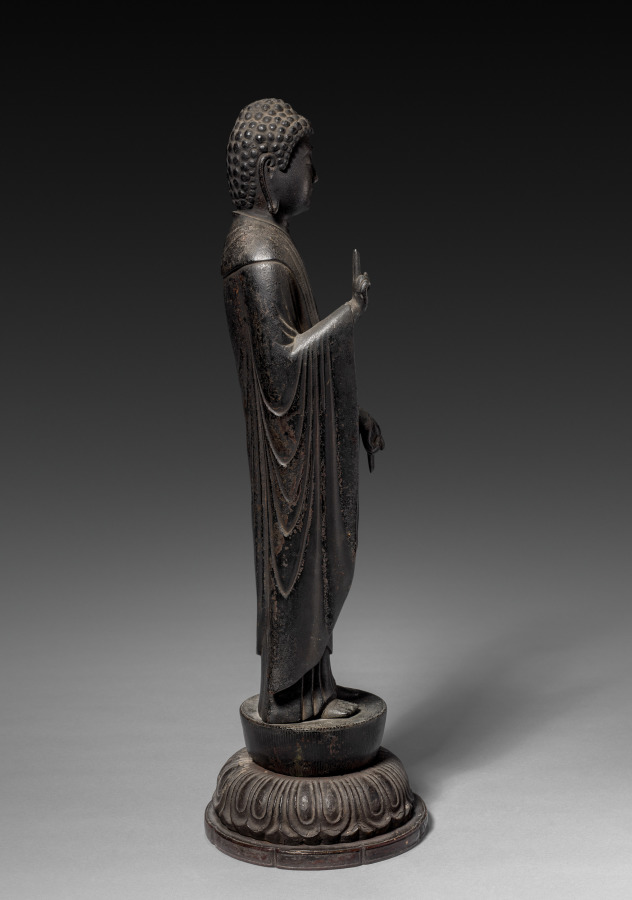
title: Amida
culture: Japan, Kamakura period (1185–1333) to Nanbokuchō period (1336–92)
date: 1300s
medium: patinated bronze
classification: Sculpture